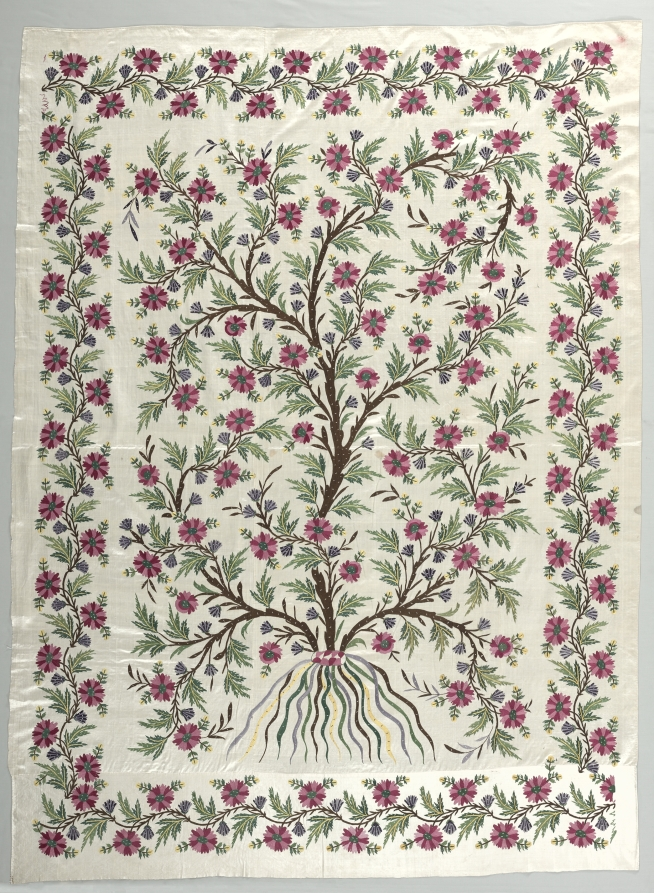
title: Cover (or Hanging)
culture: India, late 19th century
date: c. 1899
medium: embroidery, silk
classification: Embroidery